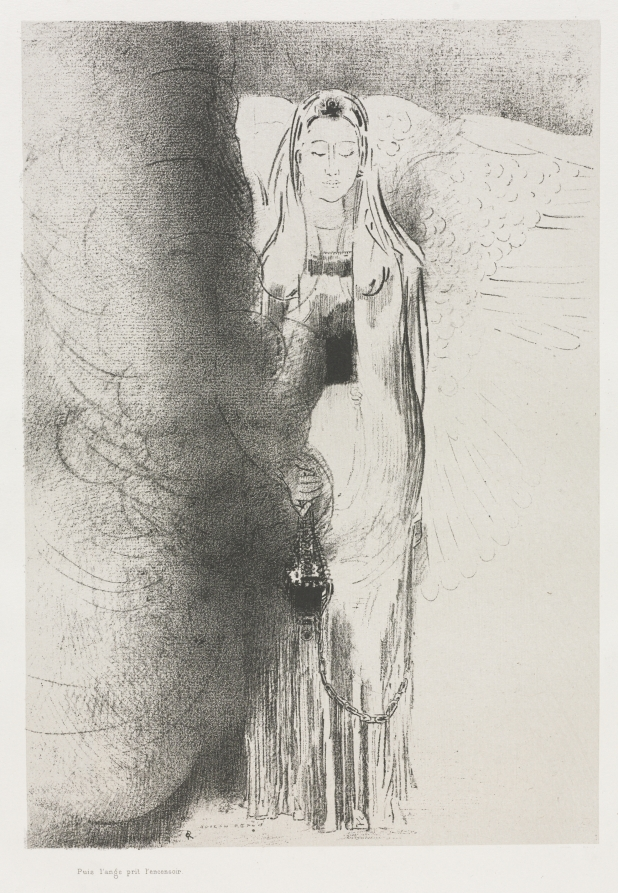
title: And the Angel Took the Censer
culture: France, late 19th Century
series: The Apocalypse of Saint John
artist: Odilon Redon (French, 1840–1916)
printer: Blanchard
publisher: Ambroise Vollard (French, 1867–1939)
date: 1899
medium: lithograph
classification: Print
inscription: signed and initialed at bottom center: OR ODILON REDON; printed at lower left, below image: Puis l'ange prit l'encensoir.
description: The last of Odilon Redon’s 11 lithographic portfolios, this series relates to the Book of Revelation from the Christian Bible. The subject had been explored throughout art history, allowing the artist to align himself with past masters, such as Albrecht Dürer. Although Redon often vaguely referenced texts, these prints directly illustrate 12 individual passages, including one about a woman clothed with the sun and another focused on a great star falling from heaven. By the time he created this portfolio, Redon’s reputation was well established. The project was published by art dealer Ambroise Vollard, who began to sell and promote Redon’s work about a year earlier, building a market for his prints in Paris and abroad.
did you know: This is one of the last works where Redon experimented with lithograph and all-black medium. In contrast, bright, dazzling colors characterize his late works.